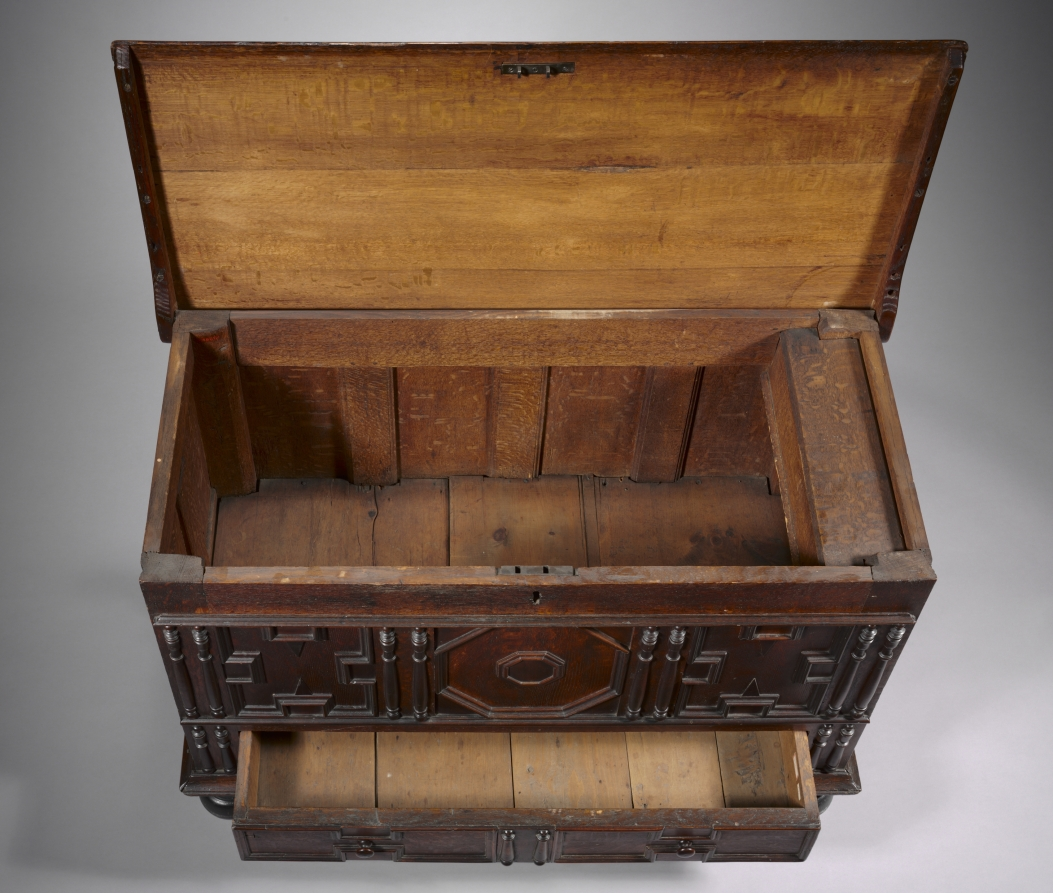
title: Chest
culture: America, Massachusetts, perhaps Salem, 18th century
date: c. 1700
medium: oak and pine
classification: Furniture and woodwork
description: This lift-top chest, with its decorative panels defined by moldings, may be associated with furniture made by John Symonds and his sons of Salem, Massachusetts. The thin, "split spindle" decorations are made by gluing two separate pieces of wood together and then splitting them after turning (shaping on a lathe).